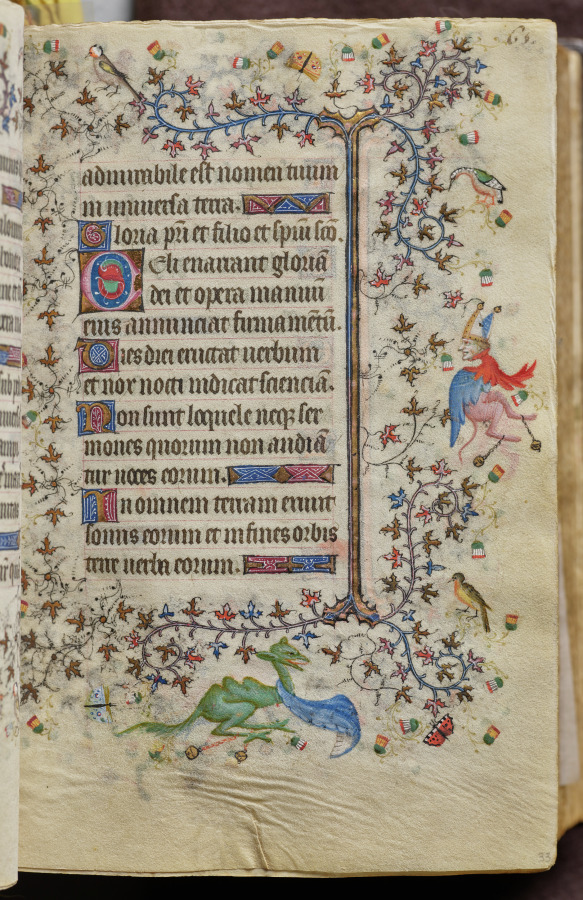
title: Hours of Charles the Noble, King of Navarre (1361-1425): fol. 33r, Text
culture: France, Paris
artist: Master of the Brussels Initials and Associates (French)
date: c. 1405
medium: ink, tempera, and gold on vellum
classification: Bound Volume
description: This precious volume was obviously highly prized by its owner, the French-born King of Navarre, who had his coat of arms painted on no less than twenty folios. Rather than directly commissioning this manuscript from a specific workshop, it seems that Charles the Noble acquired his book of hours -- perhaps ready-made for the luxury market -- while on a trip to Paris in 1404-05. A collaborative effort, six painting styles are evidenced within the pages of this codex, those of two Italians, two Frenchmen, and two Netherlanders. The painter who was responsible for the planning and decoration of the book, and who produced seventeen of the large miniatures, was a Bolognese artist known as the Master of the Brussels Initials. His principal assistant, responsible for most of the borders, was a Florentine who signed his name "Zecho" da Firenze on folio 208 verso.